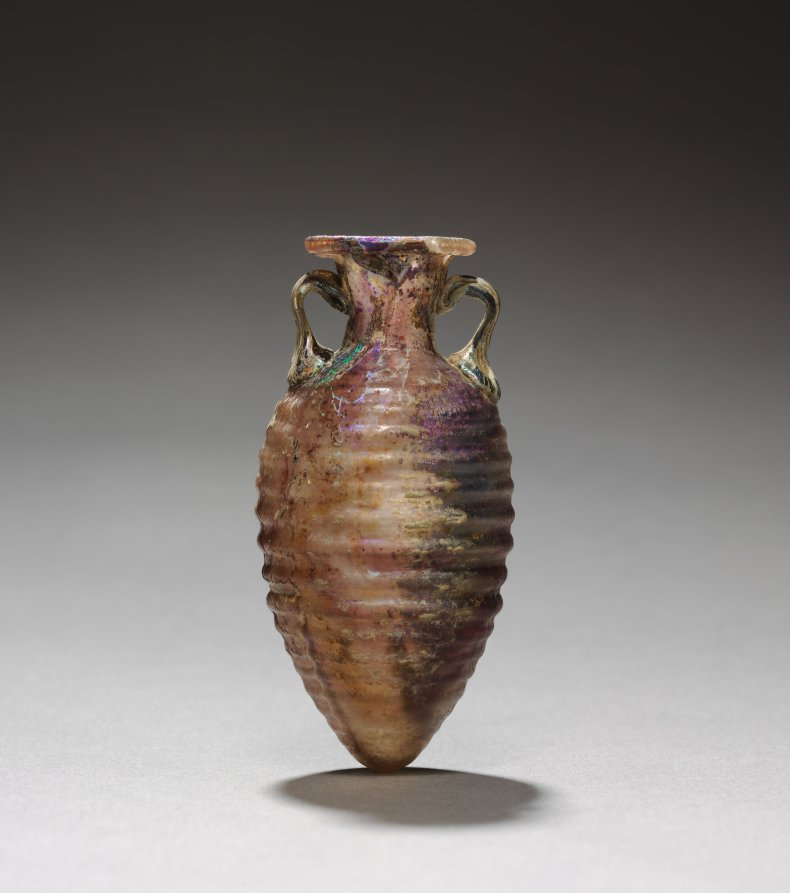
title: Amphoriskos (Small Amphora)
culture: Roman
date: 50–100 CE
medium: glass, mold-blown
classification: Glass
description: First blown in a mold, then supplied with separately made handles, this small vessel likely held perfumed oil, a valuable commodity. Originally violet in color, its surface is now partially marred by areas of buff and iridescent weathering. The finely ribbed body is quite elegant, however, and its extravagant modern box attests to its significant value for a modern owner (prior to 1919).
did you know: Although much smaller, glass amphoriskoi (“small amphorae”) are similar in form to ceramic transport amphorae.